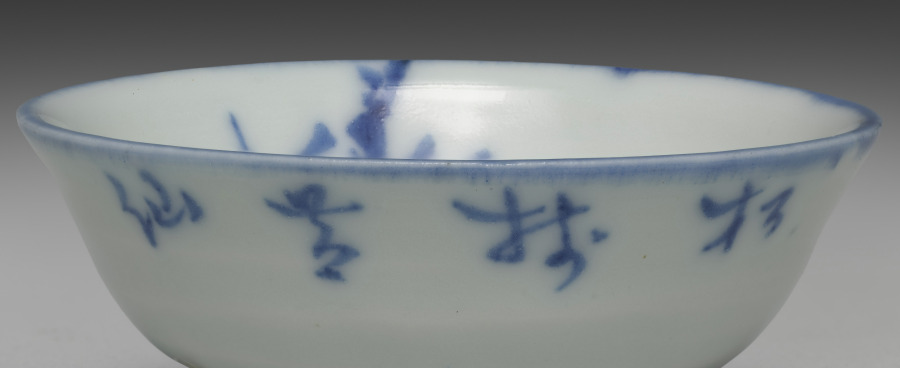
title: Sake Cup with Auspicious Plants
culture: Japan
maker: Seifū Yohei II (Japanese, 1844–1878)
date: 1861–78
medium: One of a pair of sake cups; porcelain with underglaze blue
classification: Ceramic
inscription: 松梅芝仙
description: Seifū Yohei II excelled as a painter, as evidenced by his floral and landscape designs. His works were selected as the best among Kyoto ceramics shown to jurists from Europe and the US, thus paving the way for international recognition of the studio in the late 1800s.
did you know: The plum and the pine are two of the "Three Friends of Winter," auspicious symbols of a cultured scholar's virtues: steadfastness, resilience, and flexibility.